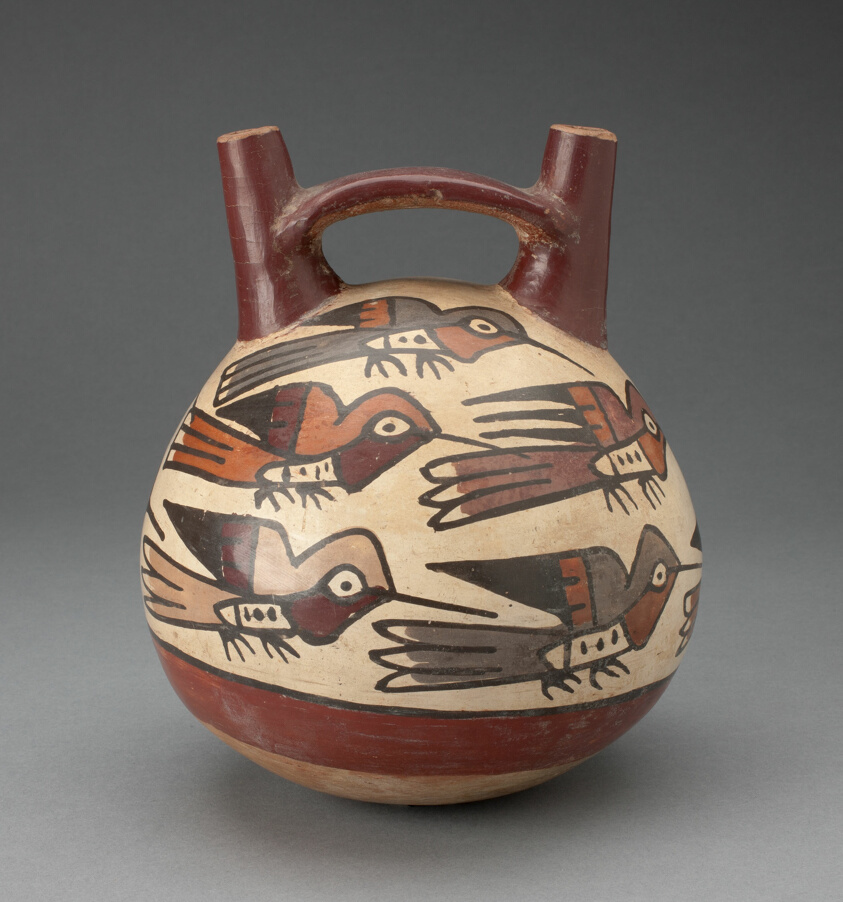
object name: Vessel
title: Double Spout Vessel Depicting Hummingbirds of Different Colors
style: nazca, early intermediate period, Pre-Columbian, americas, Arts of the Americas, andean, andes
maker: Nazca; South coast, Peru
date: 180 BCE–500 CE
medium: Ceramic and pigment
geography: Nazca Valley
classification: earthenware; ceramics; vessel; art of the americas